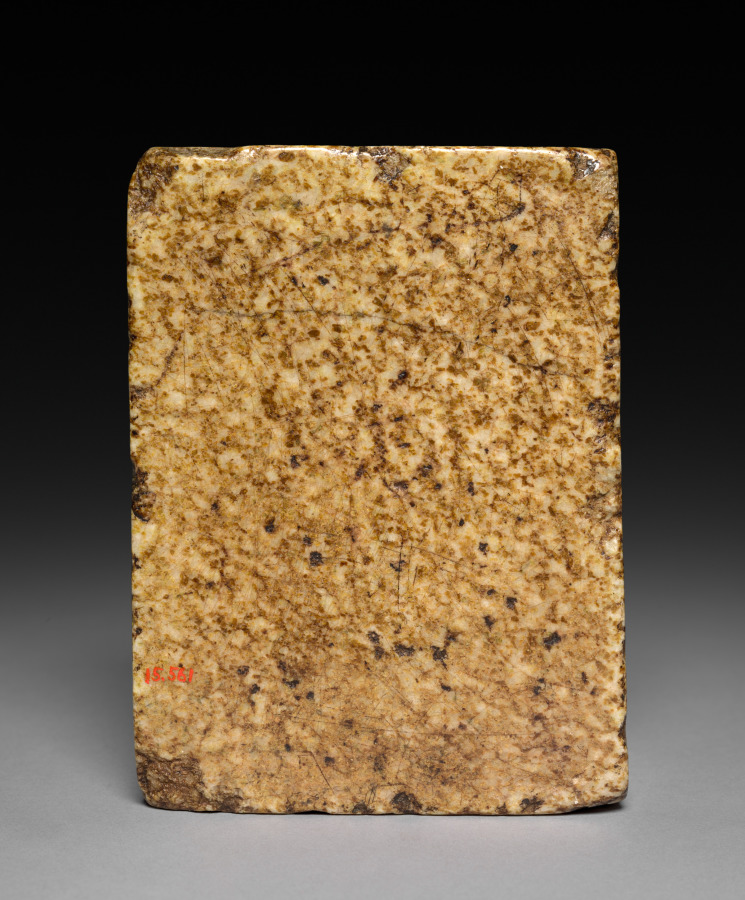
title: Sakyamuni Preaching: A Votive Stele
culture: China, Northern Dynasties period (386–581 CE), Northern Zhou (557-581)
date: c. 565 BCE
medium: Serpentinite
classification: Sculpture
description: The stele shows the historic Buddha Sakyamuni preaching, his lotus throne being flanked by lions, two attendants, and two disciples. There is a date and inscriptions on both sides of the stone.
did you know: Originally the figures and background were painted; traces of red and black remain. The figures’ clothing and some exposed skin were gilded.